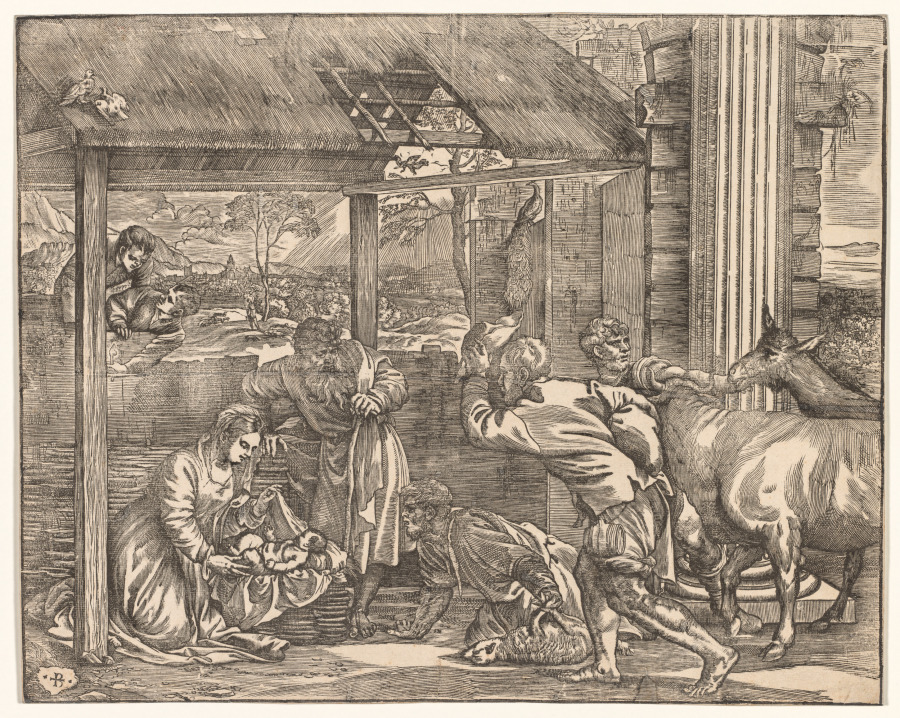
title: Adoration of the Shepherds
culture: Italy, Venice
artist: Niccolo Boldrini (Italian, c. 1500–after 1566)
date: early–mid-1500s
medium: woodcut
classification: Print